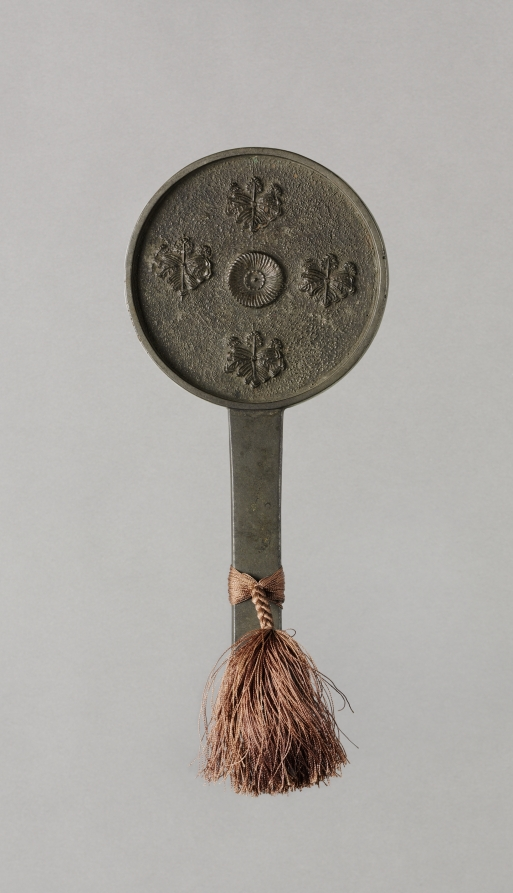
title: Mirror with Paulownia Crests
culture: Japan, Muromachi period (1392–1573)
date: 1392–1573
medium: bronze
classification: Metalwork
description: The Japanese used chrysanthemums as decorative elements on mirrors. In the Heian period, a chrysanthemum with cranes or long-tailed birds was a common motif. Later, in the Kamakura and Muromachi periods, chrysanthemum designs were divided into three patterns with different symbolic associations: Chrysanthemum with Cranes represented longevity; Water Flowing suggested longevity as well as the Noh drama Kikujido, or Chrysanthemum Boy; and East Fence alluded to the poem "Drinking Wine" by Tao Yuanming (AD 365-427). Here, the mirror featuring Buddhist iconography (kyojo) and a chrysanthemum design on the back shows that the flower was also appreciated in the context of Buddhism in the Kamakura period.